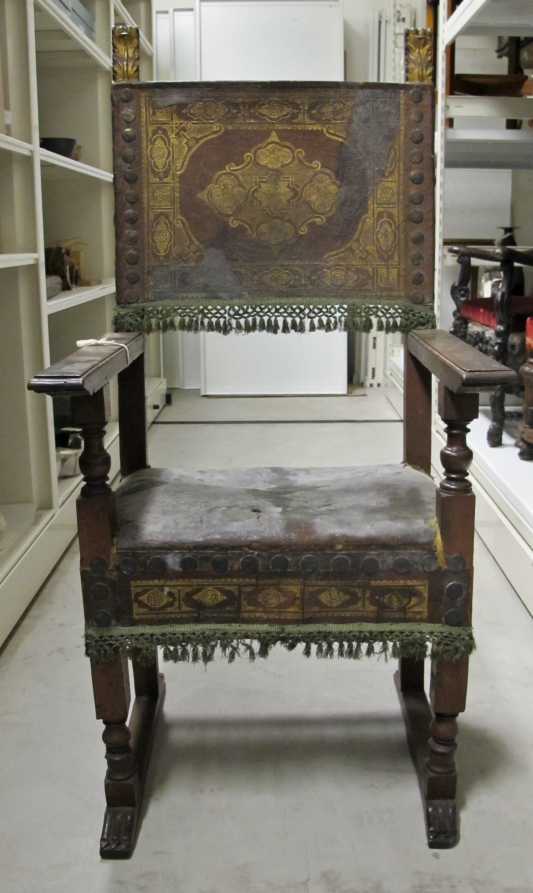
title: Armchair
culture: Italy, 17th century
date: 1600s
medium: walnut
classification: Furniture and woodwork